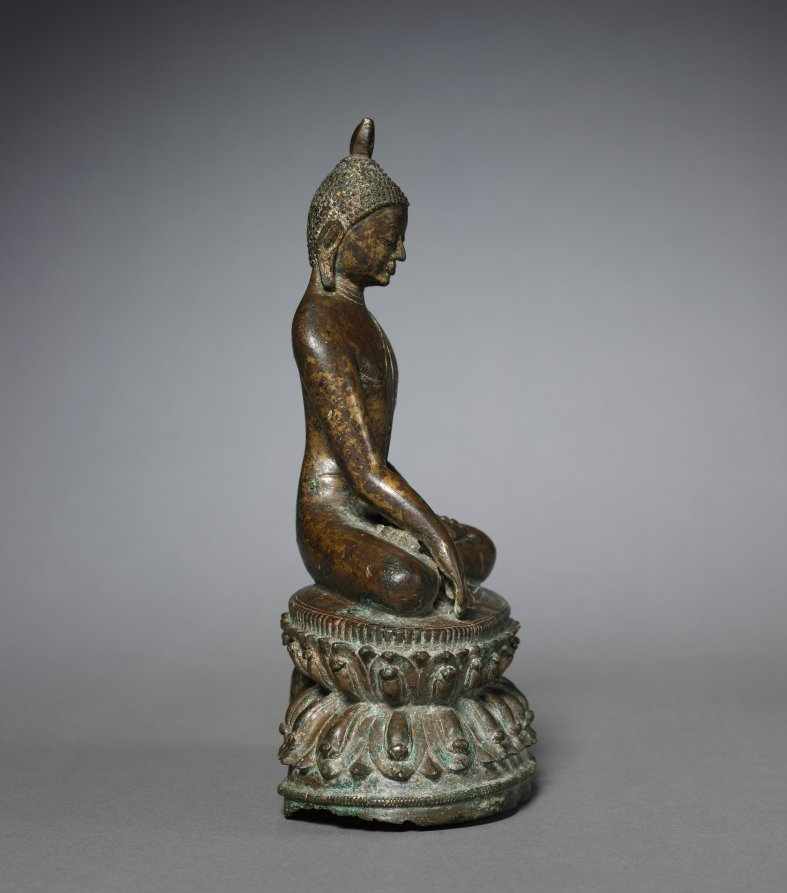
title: Sakyamuni Buddha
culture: Burma, Pagan style, 12th century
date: 1100s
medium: bronze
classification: Sculpture